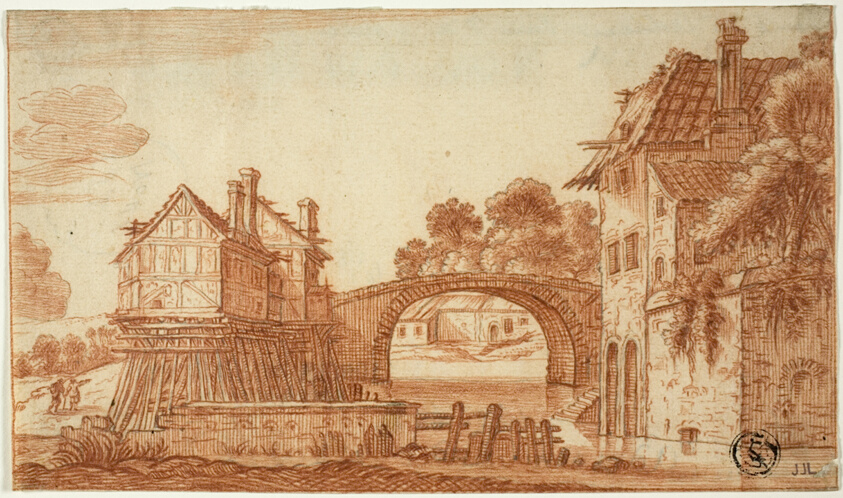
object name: Drawing and Watercolor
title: Old Houses on Canal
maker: After Jan van de Velde, I (Dutch, c. 1568-1623); or after Esaias van de Velde, I (Dutch, 1587-1630); or Adriaen van de Velde (Dutch, 1636-1672)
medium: Red chalk over traces of graphite, on ivory laid paper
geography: Holland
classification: chalk; drawings (visual works); prints and drawing